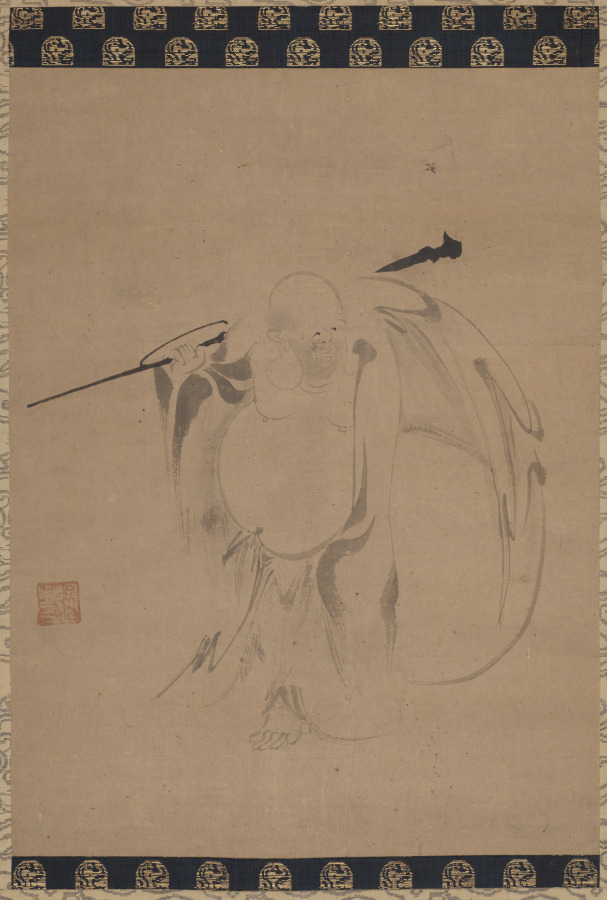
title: Hotei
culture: Japan, Muromachi period (1392–1573)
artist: Tokuchū (Japanese, late 1400s)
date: late 1400s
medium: hanging scroll; ink on paper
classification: Painting